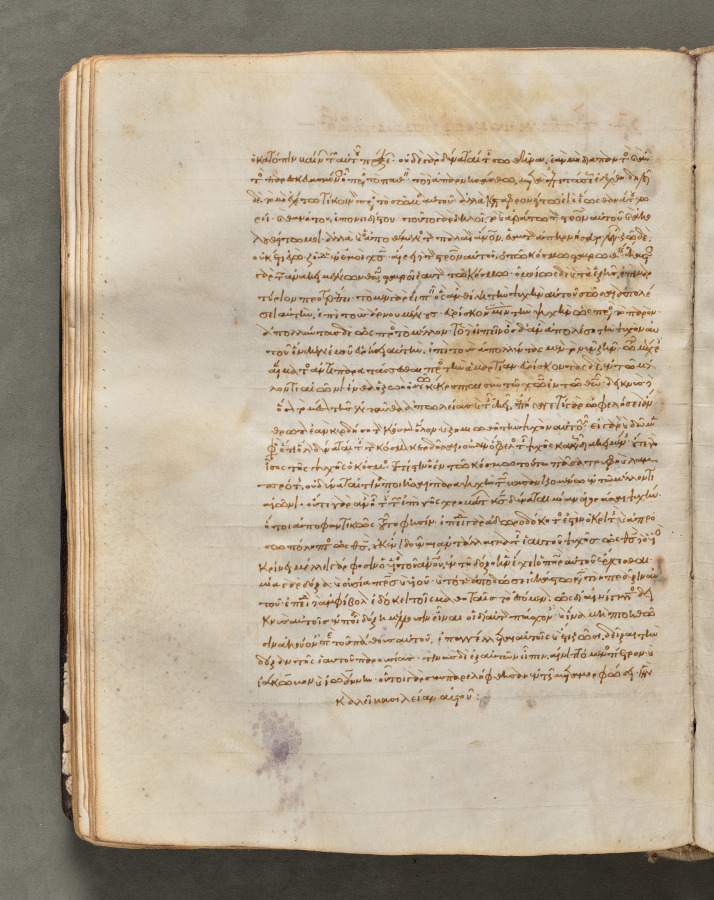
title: Text, folio 75 (verso), from a Gospel Book with Commentaries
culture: Byzantium, Constantinople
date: c. 1000–1100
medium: ink, tempera, and gold on vellum; leather binding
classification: Bound Volume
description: Each of the four gospels in this book opens on a page with brilliantly illuminated borders depicting the author of the text as well as birds-principally peacocks, symbols of the immortality of the soul-and fountains, representing the fountain of life and the salvation of the soul. This volume consists of 428 leaves with texts in Greek. Its level of sophistication suggests that it was probably written and decorated in a monastery in Constantinople.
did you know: Gospel Books were carried in procession through Byzantine churches.